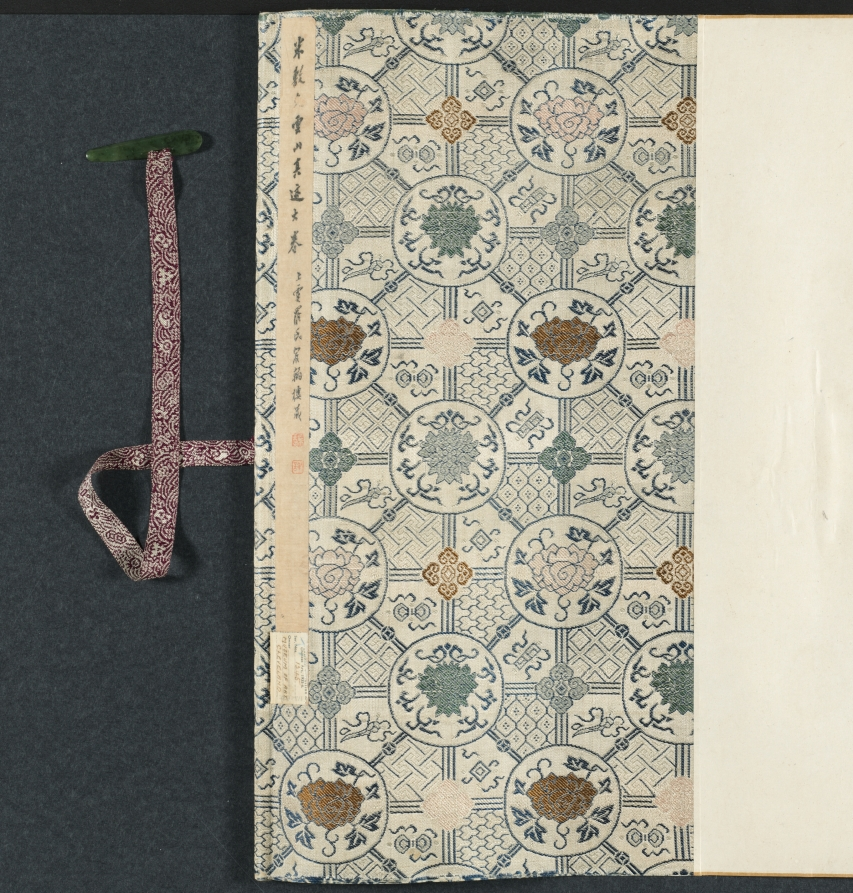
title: Cloudy Mountains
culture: China, Southern Song dynasty (1127-1279)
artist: Mi Youren (Chinese, 1072–1151)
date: 1130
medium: Handscroll; ink and color on silk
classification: Painting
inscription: 好山無數接天涯，烟靄陰晴日夕佳。/ 要識先生會到此，故留筆戲在君家。/ 庚戍歲，辟地新昌作。元暉。/ [seal] 元暉戲作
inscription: [Seal] 安陽孫氏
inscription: [Seal] 畢瀧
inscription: [Seal] 成親王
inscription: [Seal] 永瑆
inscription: [Seal] 錫三 appears twice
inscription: [Seal] 養性齋珍藏書畫印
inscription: [Seal] 芷陔審定真跡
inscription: [Seal] 玉簡齋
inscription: 2 colophons (1 dated 1650), inscription dated 1647, and 2 seals of Wang To (1592–1652)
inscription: 1 colophon, dated second month of the gengyin year 庚寅 (1650), and 2 seals of Chen Kuang 陳爌 (1646 jinshi degree)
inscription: 7 seals unidentified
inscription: A separate scroll containing six colophons on Cloudy Mountains exists; the inscribers are Luo Zhenyu 羅振玉 (1866–1940), Naito Torajiro 內藤虎次郎 (1866–1934), Nagao Ko 長尾甲 (1864–1942), and Wu Changshuo 吳昌碩 (1844–1927). Naito Torajiro alone wrote three colophons.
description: Cloudy Mountains captures the view of a lush and misty riverscape, an impression of Mi Youren’s new environment, painted in a moment of peace. With the fall of the Northern Song dynasty in 1127 upon the Jurchen’s military invasion, Mi Youren fled south across the Yangzi River. In 1130, he had reached Xinchang in Zhejiang province and thanked his host with this painting for having given him shelter. Mi Youren was the oldest son of the art critic Mi Fu (1051– 1107); both developed a distinct style of mountain scenery by accumulating wet ink dots that create a hazy atmosphere.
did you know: This scroll is one of the museum’s earliest dated Chinese paintings.